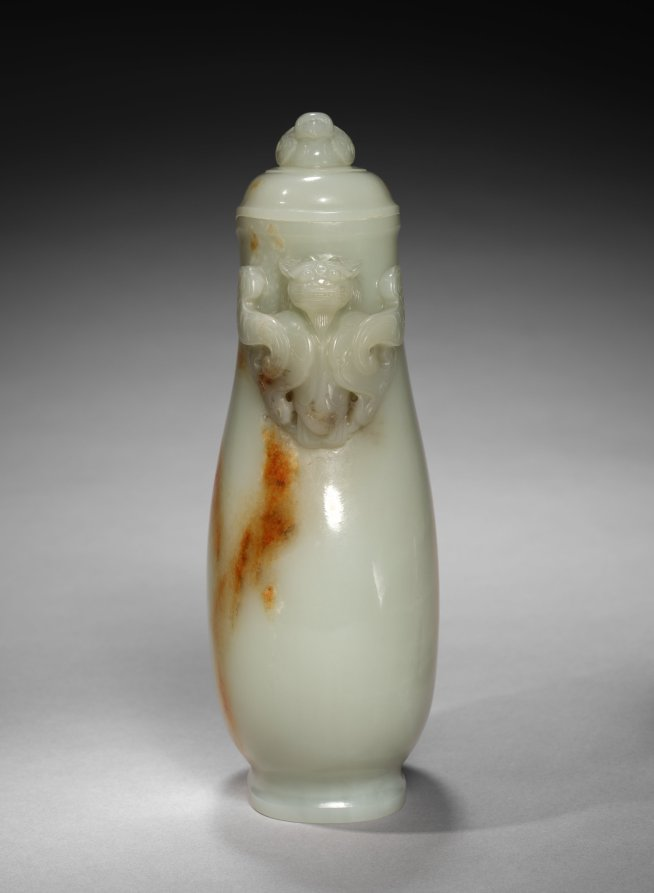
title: Pitcher (Gong) with Dragon and Bird-Headed Handle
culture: China, Qing dynasty (1644–1911)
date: 1700s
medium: pale greenish-white jade with brown markings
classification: Jade